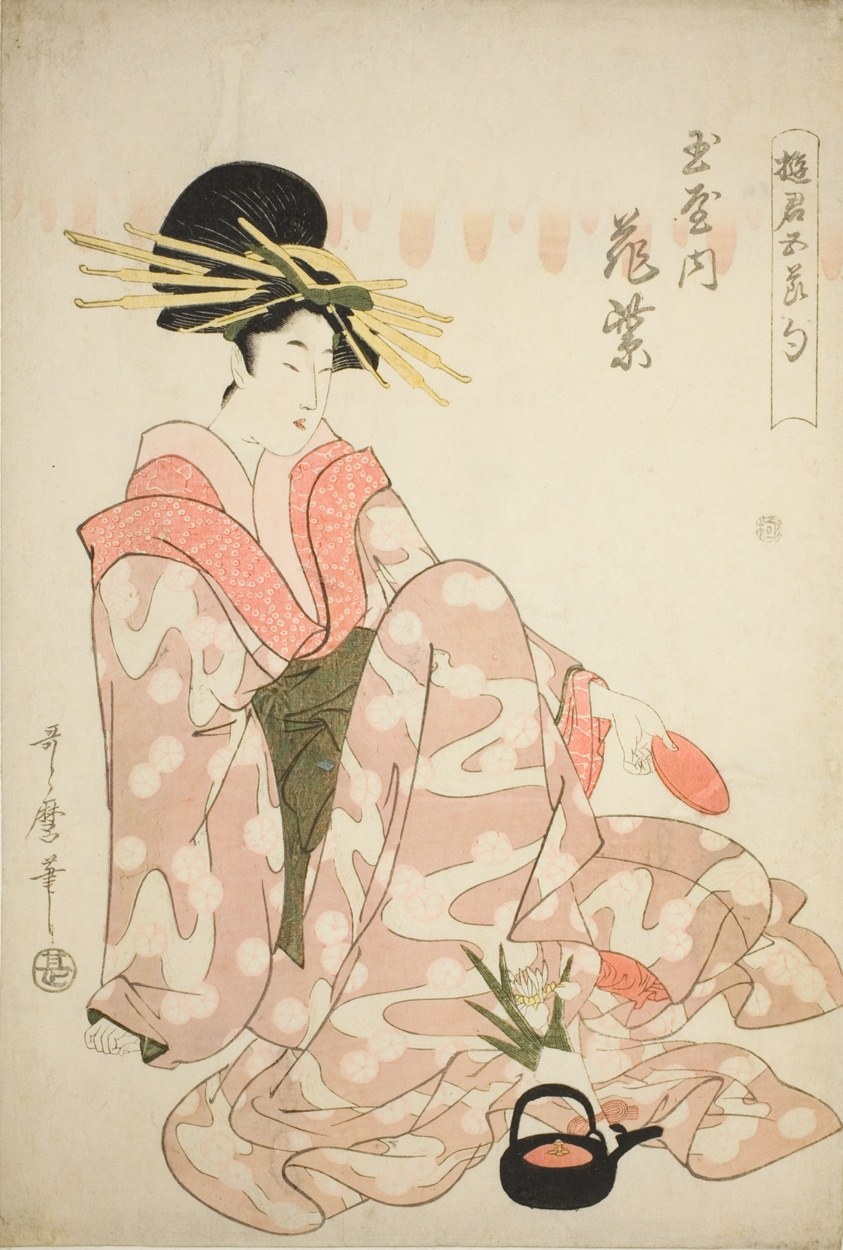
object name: Print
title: The Courtesan Hanamurasaki of the Tamaya, from the series "Courtesans of the Five Festivals (Yukun gosekku)"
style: Japanese (culture or style)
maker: Kitagawa Utamaro 喜多川 歌麿; Japanese, 1753 (?)-1806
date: c. 1805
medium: Color woodblock print; oban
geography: Japan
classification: woodblock print; print; asian art